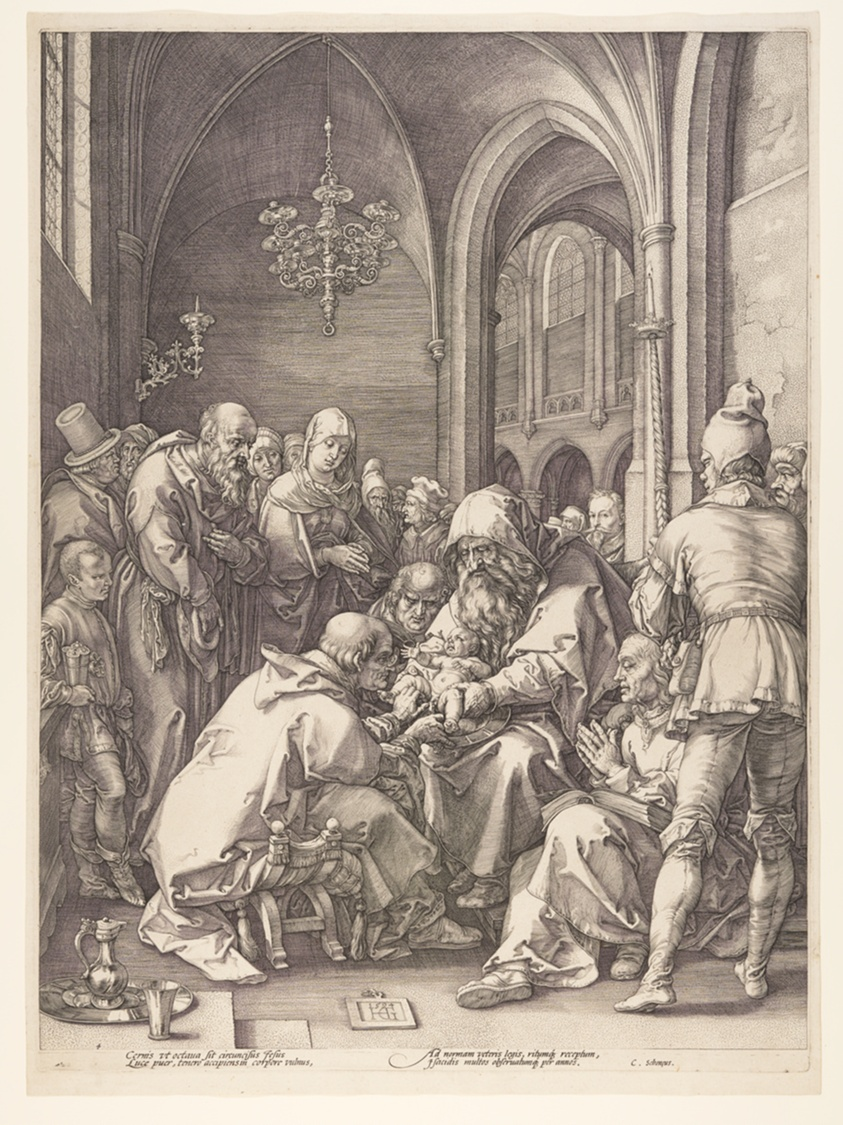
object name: Print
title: The Circumcision, from The Birth and Early Life of Christ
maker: Hendrick Goltzius (Dutch, 1558–1617)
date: 1594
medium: Engraving on ivory laid paper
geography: Netherlands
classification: engraving; paper; print; prints and drawing